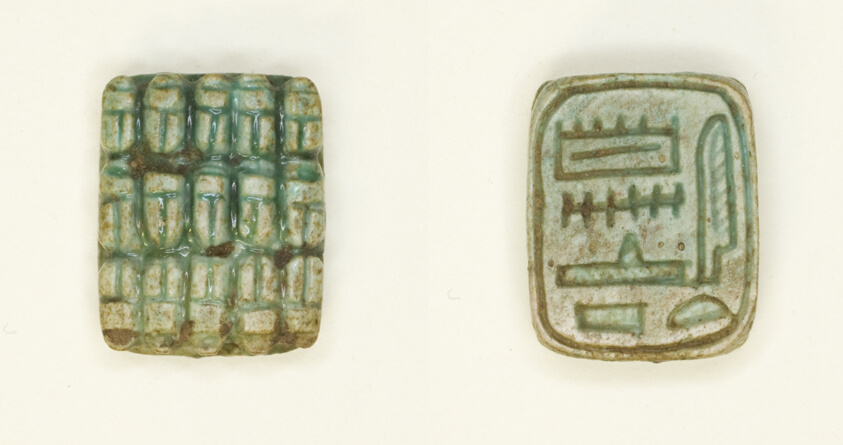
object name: Costume and Accessories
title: Plaque: 15 Scarabs/”Amun is Satisfied”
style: egyptian, eighteenth dynasty, new kingdom, ancient, middle kingdom, twelfth dynasty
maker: Egyptian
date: Middle Kingdom, Dynasty 12 (about 2055–1650 BCE) OR New Kingdom, Dynasties 18–20 (about 1550–1069 BCE)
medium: Steatite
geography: Egypt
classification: scaraboids; amulet; ancient art; costume; plaque (flat object)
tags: scarab beetle, Hieroglyphs